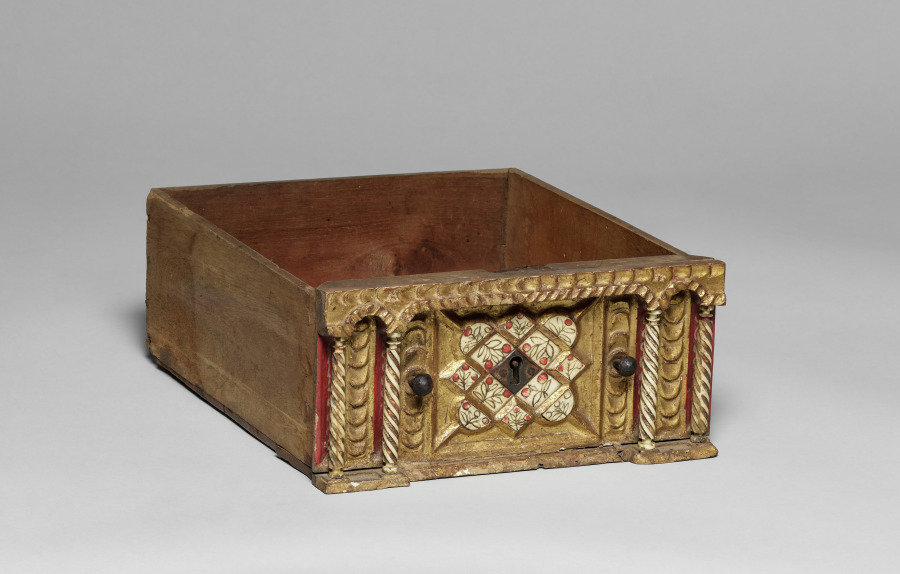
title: Chest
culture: Spain, Colonial, late 17th Century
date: late 1600s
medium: turned and joined wood, gilded and painted red with applied bone columns and bone inlays, wrought iron hardward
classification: Furniture and woodwork